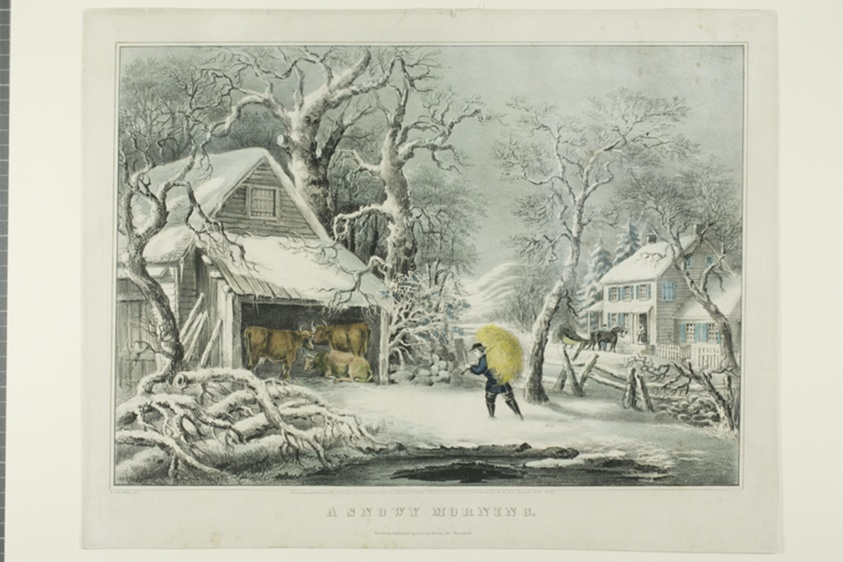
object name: Print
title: A Snowy Morning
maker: Fanny F. Palmer (American, born England, 1812-1876); published by Currier and Ives (American, 1857-1907)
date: 1864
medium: Lithograph, with hand-coloring on ivory wove paper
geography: United States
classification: lithograph; print; prints and drawing